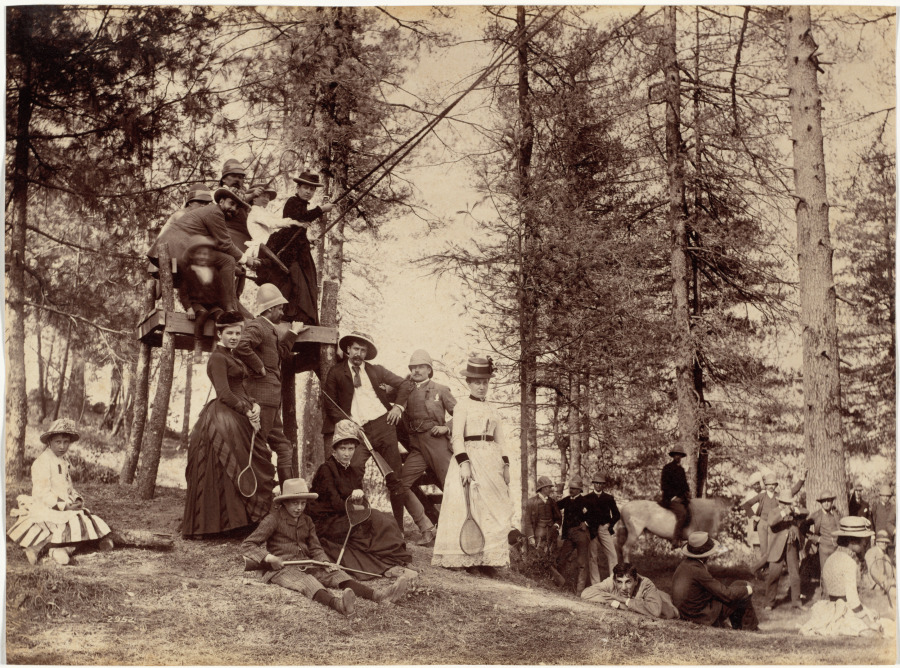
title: Picnic party, Mashobra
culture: India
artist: Raja Deen Dayal (Indian, 1844–1905)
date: 1887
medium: albumen print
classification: Photograph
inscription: Imprinted in white on recto: “2952” Stamped in purple ink on verso: “LALA DEEN DIYAL/PHOTOGRAPHER/INDORE/c.” Stamped in black ink on verso: “21.7.F” Written in pencil on verso: “2952”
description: This scene is from one of many lavish entertainments hosted by caterer, restaurateur, and hotelier Federico Peliti (Italian, 1844–1914) at his forested country estate outside Shimla. In the photograph, Peliti is on horseback and his wife Judith on the swing. Swings have a long history as items of leisurely pleasure in Europe and India. Badminton, which originated in England in 1873, was popular in India. Deen Dayal may have been invited to document this gathering because he and Peliti, an amateur photographer, both belonged to the Photographic Society of Bombay.